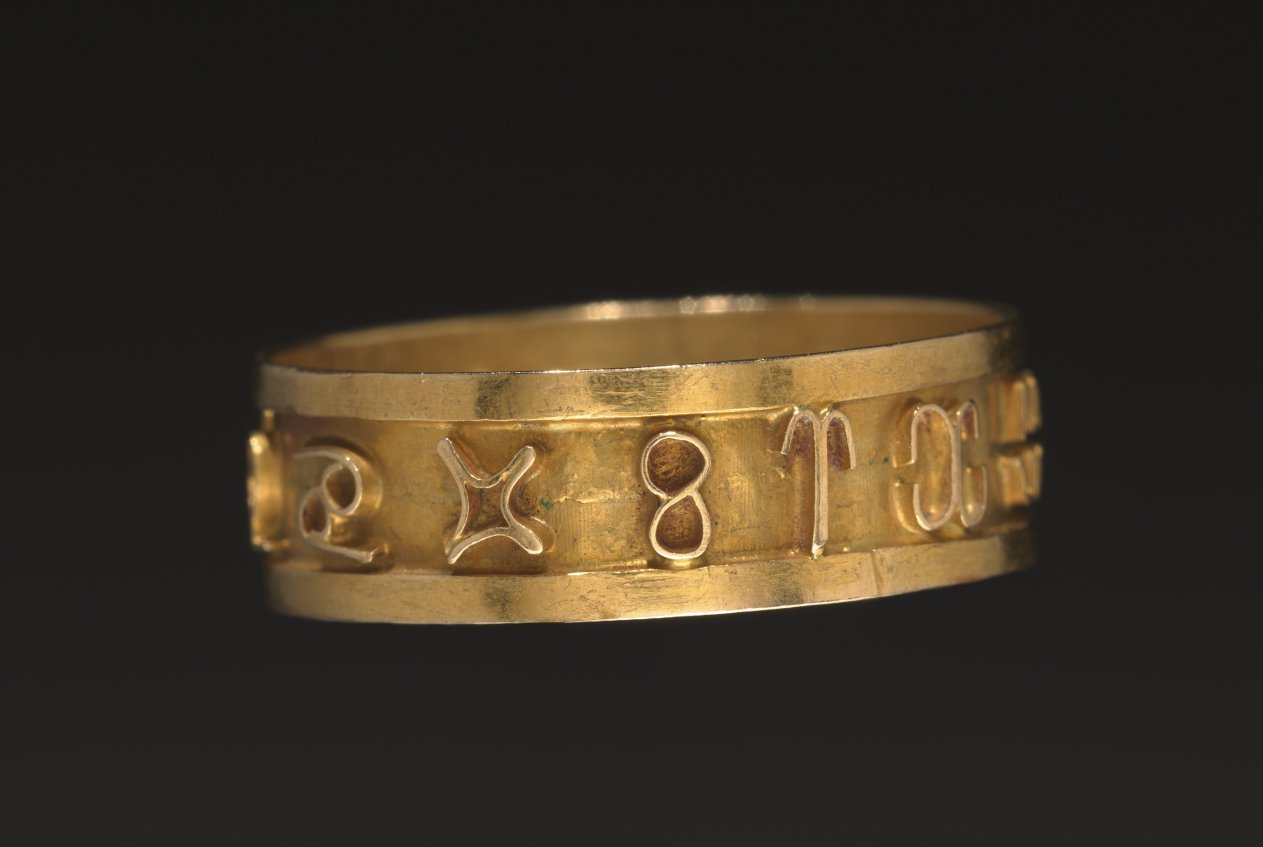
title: Ring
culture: Africa, North Africa, unknown maker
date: 1700s–1800s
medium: Gold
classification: Jewelry